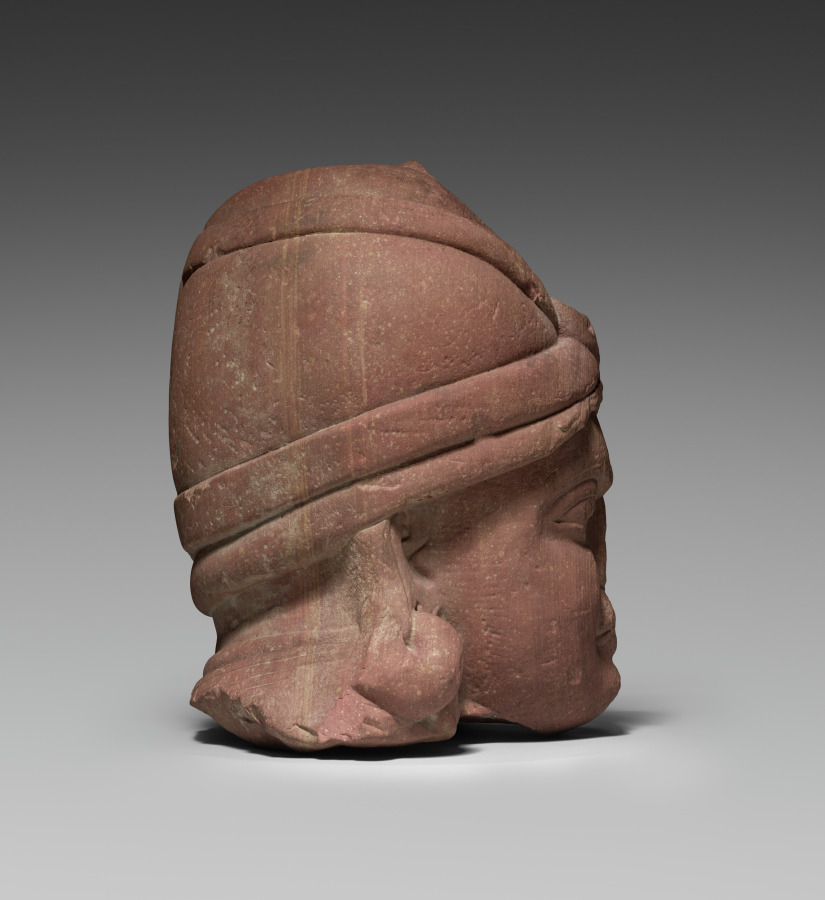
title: Head of a Yaksha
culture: Northern India, Uttar Pradesh, Mathura, Shunga period (185–78 BCE)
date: c. 125 BCE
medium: mottled red sandstone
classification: Sculpture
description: Colossal statues of yakshas, male divinities who personify the productive forces of nature, were especially popular in the northern Indian region around the ancient city of Mathura. They were installed in shrines in parks and gardens, often associated with extraordinary trees. The red sandstone is from a nearby quarry, called Sikri.